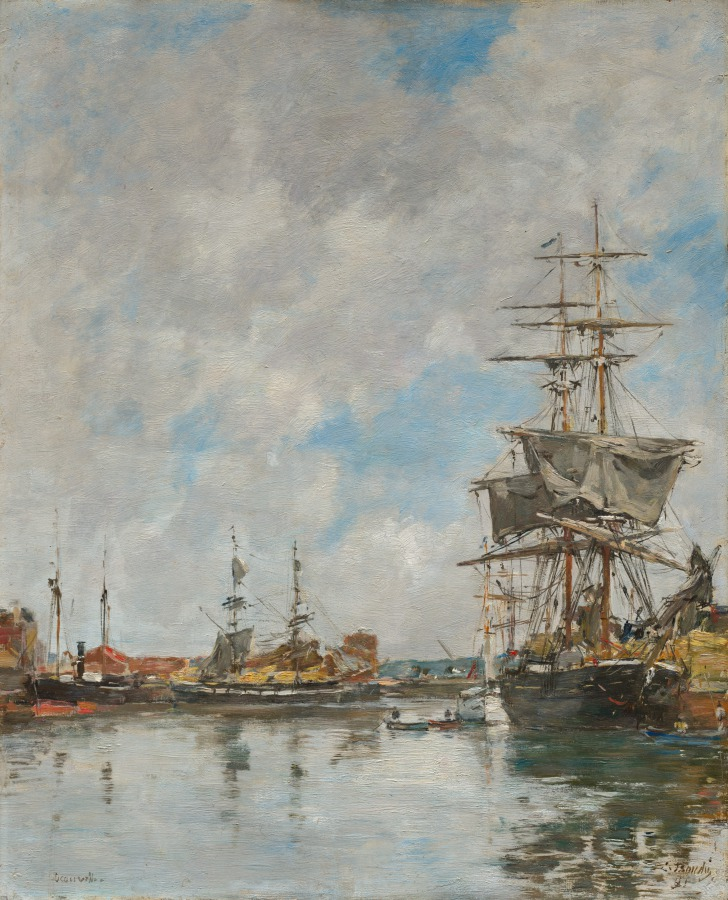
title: The Dock of Deauville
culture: France, 19th century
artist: Eugène Boudin (French, 1824–1898)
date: 1891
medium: oil on wood panel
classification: Painting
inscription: Signed lower right: E. Boudin / 91 Inscribed lower left: Deauville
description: This painting treats a common theme in Eugène Boudin's mature art: ships at harbor. Boudin typically did not depict the busy commercial life or human tasks related to ships; rather, he seemed always to strive for an overall mood of calm, harmony, and light. Although Boudin's brushwork was quite sketchy at this time, he was still able to suggest the complex sails and structures of large vessels. Here he rubbed light tones around the ships' masts, often overlapping the darker lines of the wood and rigging with white or gray tones as if to evoke the passing wind and shifting positions common to nautical life.